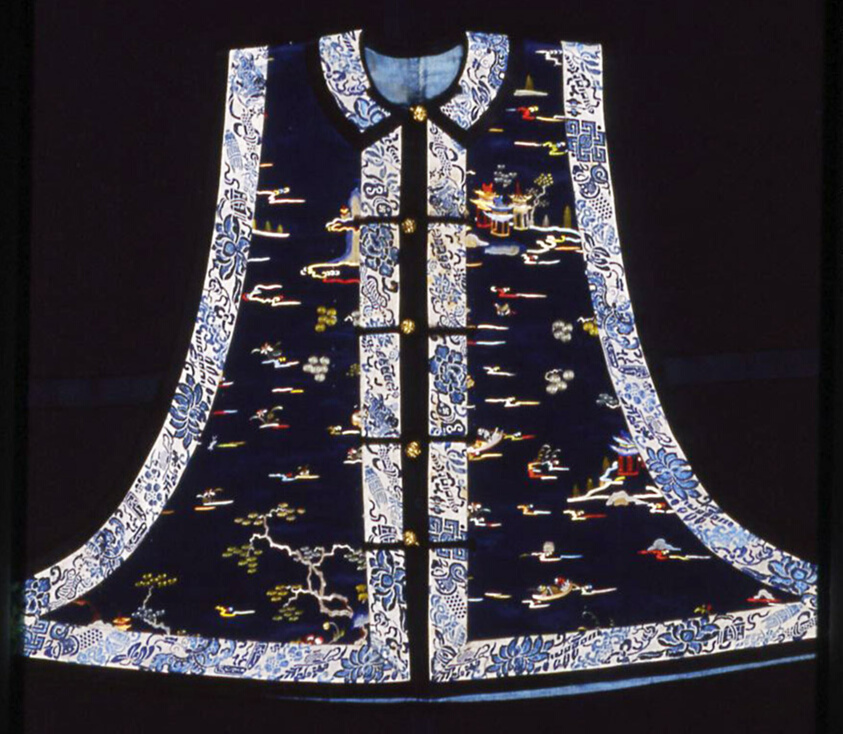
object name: Costume and Accessories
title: Woman's Vest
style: qing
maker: Manchu (China)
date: Qing dynasty (1644–1911), 1800/25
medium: Silk, warp-float faced 7:1 satin weave; embroidered with silk in satin, single satin and stem stitches; Chinese knots and couching; padded; inner tape: silk, warp-float faced 7:1 satin weave with supplementary patterning wefts; edged with silk, warp-float faced 7:1 satin weave; lined with silk, plain weave; button loops: silk, warp-float faced 7:1 satin weave; metal buttons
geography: China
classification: textile; needlework (visual works); weaving; costume